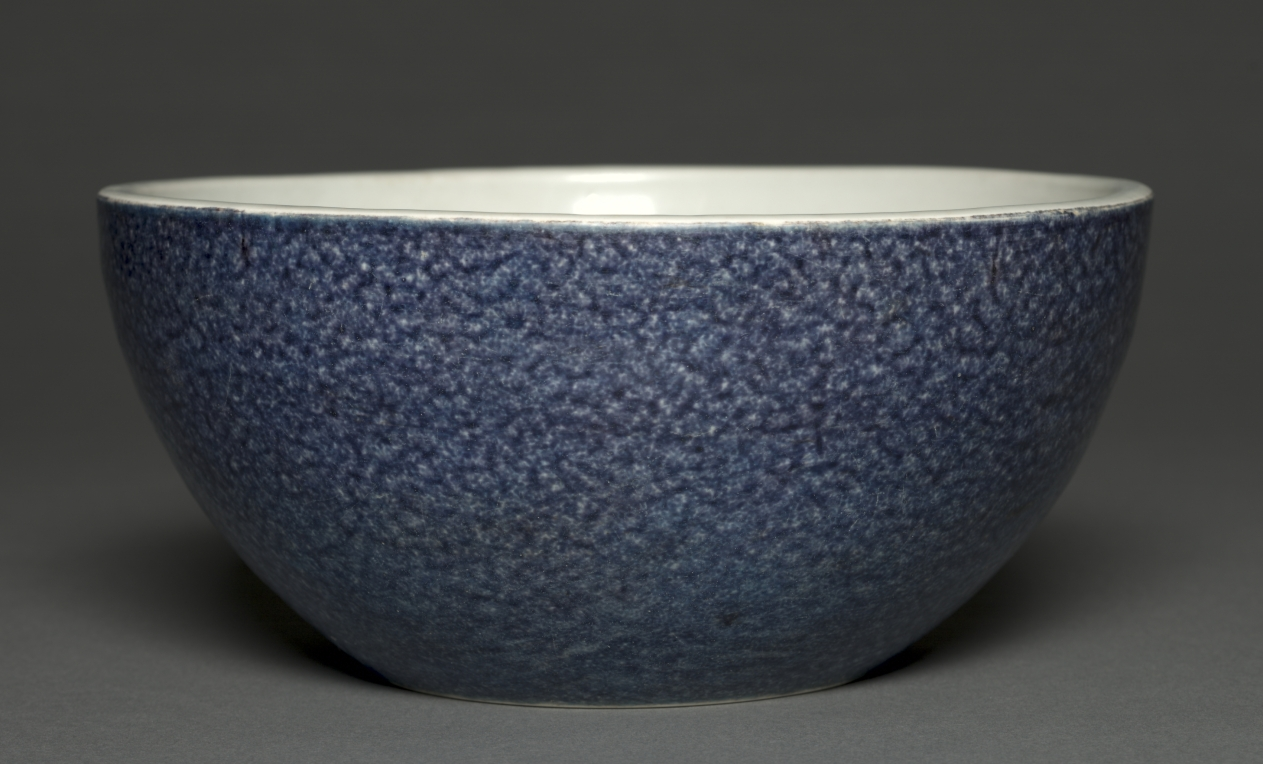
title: Dice Bowl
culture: China, Jiangxi province, Jingdezhen, Ming dynasty (1368-1644), Xuande mark and period (1426-1435)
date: 1426–35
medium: porcelain with mottled blue glaze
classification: Ceramic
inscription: 大明宣德年製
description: The Chinese connoisseurs use the poetic term "snowflake blue" to describe the mottling effects of white blotches amid tones of blue colored with cobalt oxide. Such aesthetic effects were achieved by blowing the glaze through a bamboo tube onto the ceramic surfaces.